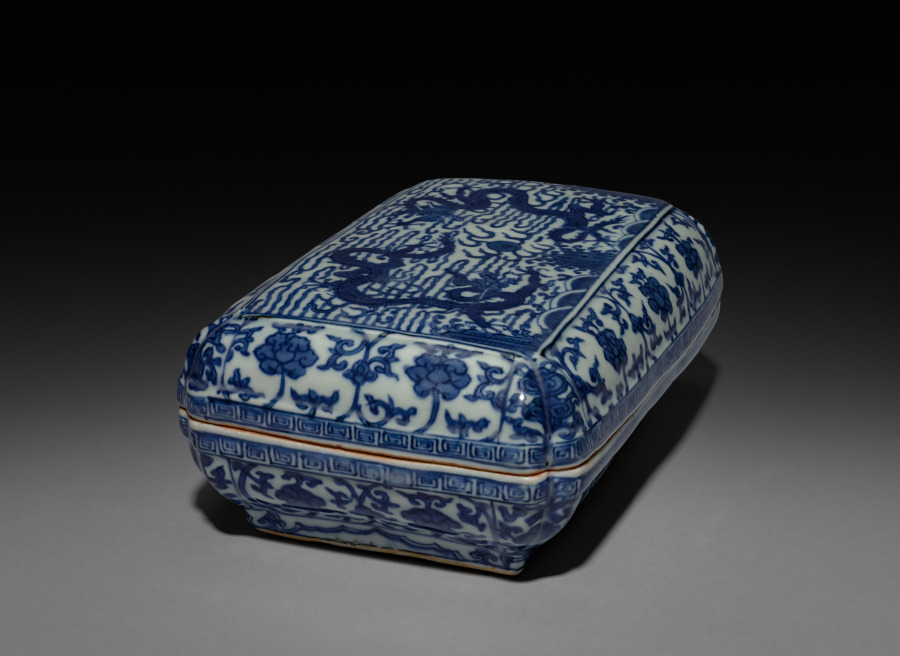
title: Covered Box with Dragons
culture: China, Jiangxi province, Jingdezhen kilns, Ming dynasty (1368-1644), Wanli reign (1572-1620)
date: 1573–1620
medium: porcelain with underglaze blue decoration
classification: Ceramic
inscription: 大明萬曆年製